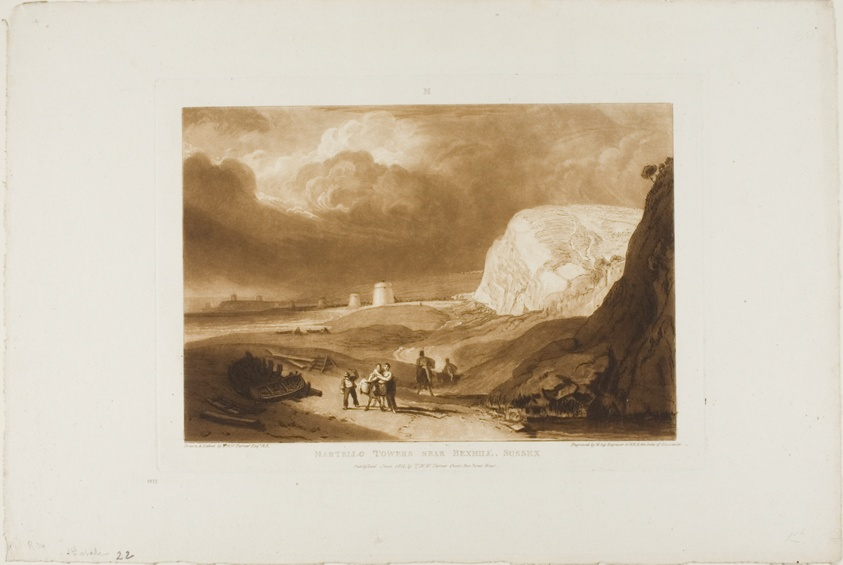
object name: Print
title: Martello Towers Near Bexhill, Sussex, plate 34 from Liber Studiorum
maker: Joseph Mallord William Turner (English, 1775-1851); Engraved by William Say (English, 1768-1834)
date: published June 1811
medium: Etching and engraving in brown on ivory wove paper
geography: England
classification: etching; print; prints and drawing